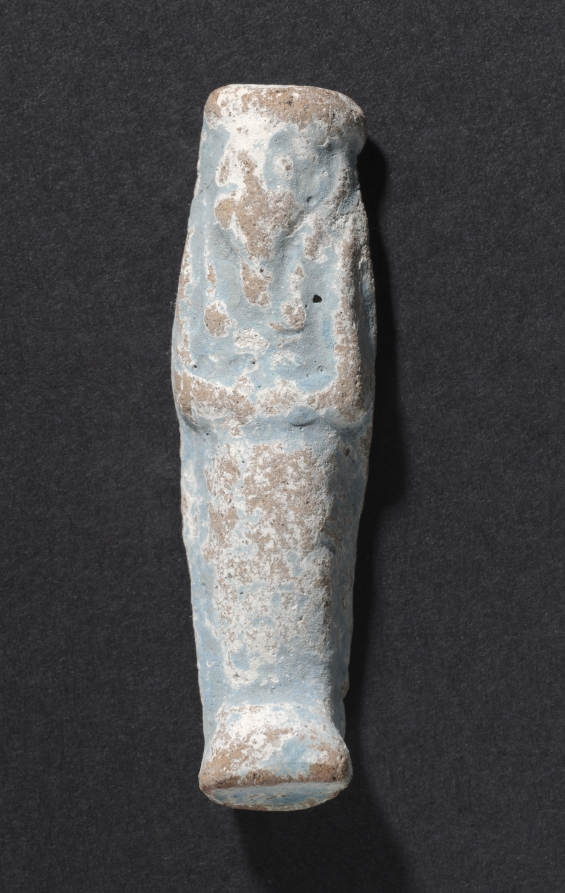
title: Shawabty of Ditamenpaankh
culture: Egypt, Late period (715–332 BCE), Dynasty 25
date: 715–656 BCE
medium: terracotta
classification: Funerary Equipment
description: High demand for shawabtys in the Late Period, a time when as many as 400 or more shawabtys were placed in the tomb with the deceased, gave rise to a specialized container for storing them: the shawabty box. This example is inscribed for the lady of the house, Ditamenpaankh, and was probably one of a pair originally made for her. The single-masted boat on the box's lid is perhaps an allusion to the pilgrimage of the deceased to the holy city of Abydos, the cult city of Osiris, king of the dead. The shawabtys inside are crude, mass-produced examples cast in an open mold. Made of terracotta, their blue paint imitates more costly shawabtys made of faience. As for the shawabty spell, it has been removed from its traditional location on the shawabty's front and relocated onto the sides of box, where it needed only to be written once, thus expediting production.